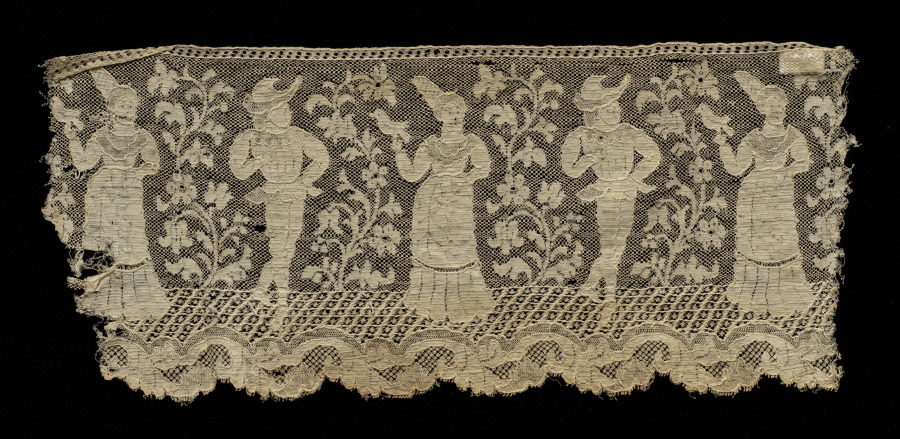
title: Lace Edging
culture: England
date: 1811–15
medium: Machine-made lace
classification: Lace